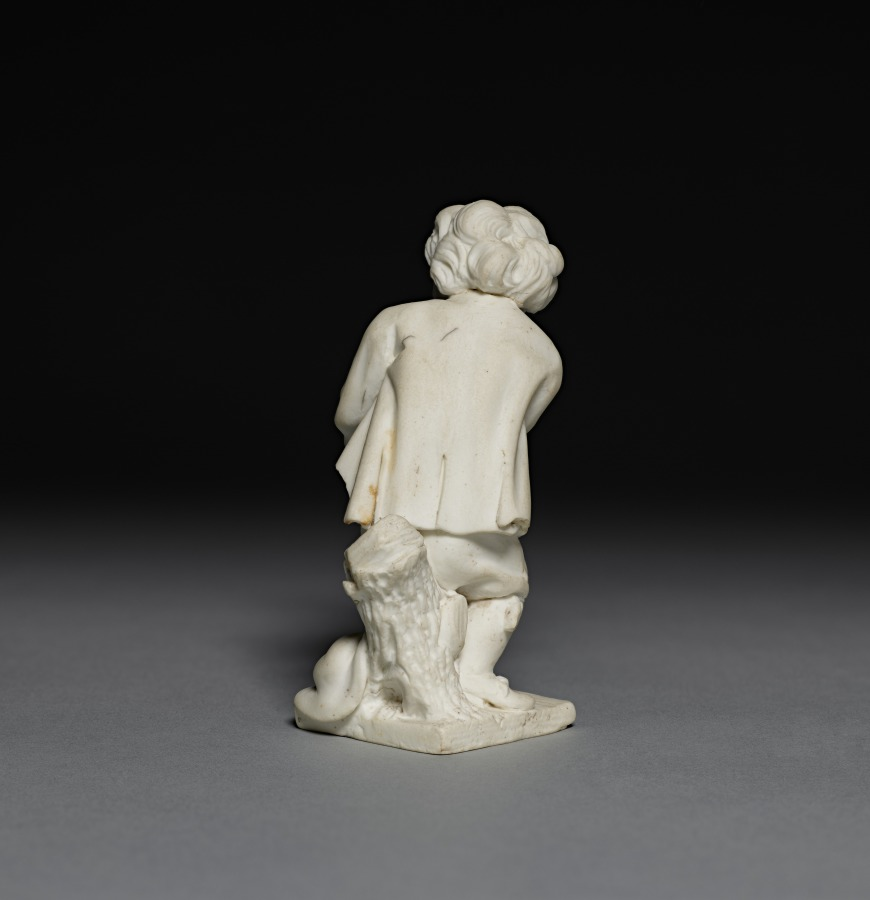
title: Figure of a Mischief Maker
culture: France, Sèvres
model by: Etienne-Maurice Falconet (French, 1716–1791)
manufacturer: Sèvres Porcelain Factory (French, est. 1756)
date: 1766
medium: Unglazed soft-paste porcelain (biscuit)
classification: Ceramic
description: Over a period of three years, designs for 17 young children involved in various activities were issued by sculptor Étienne-Maurice Falconet after which they were regularly reproduced as porcelain figurines. This figure, who pulls back a slingshot, would have been modeled after one of these designs. Decorative figurines like these were often included in elaborate dining services to be placed about a table along with the usual tureens and tableware.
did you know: Thirty-one figures modeled after Falconet’s series were included in the dinner service given by French King Louis XV to Christian VII, King of Denmark, in 1768.